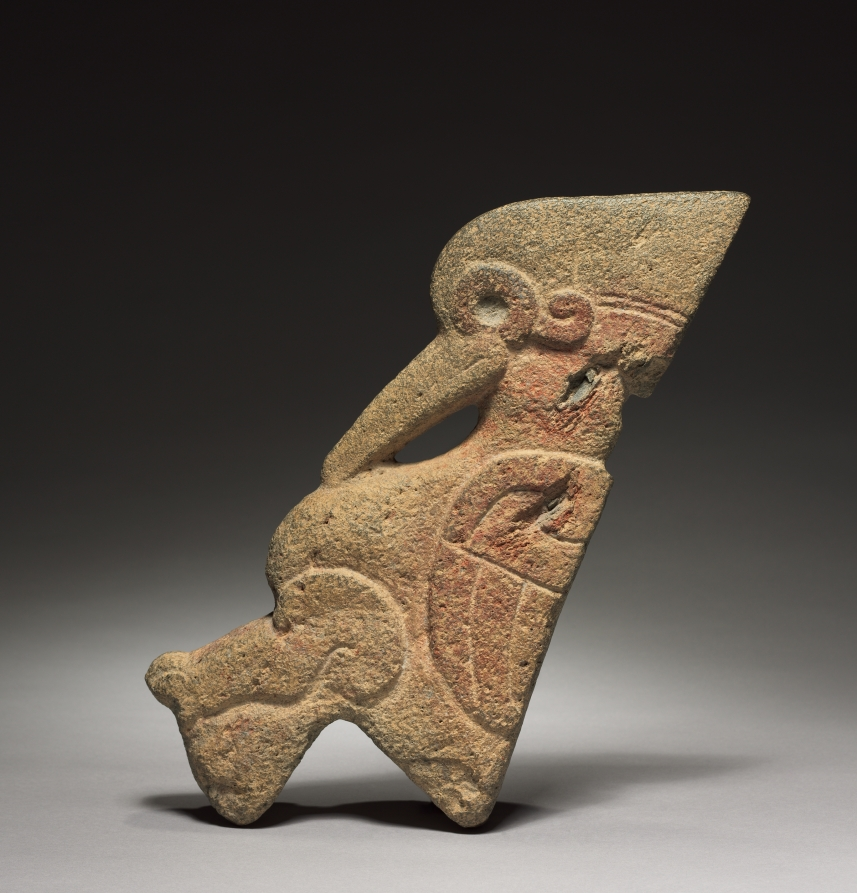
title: Bird Hacha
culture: Mexico, Veracruz, El Tajín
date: 300–900 CE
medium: gray volcanic stone with red pigment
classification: Sculpture